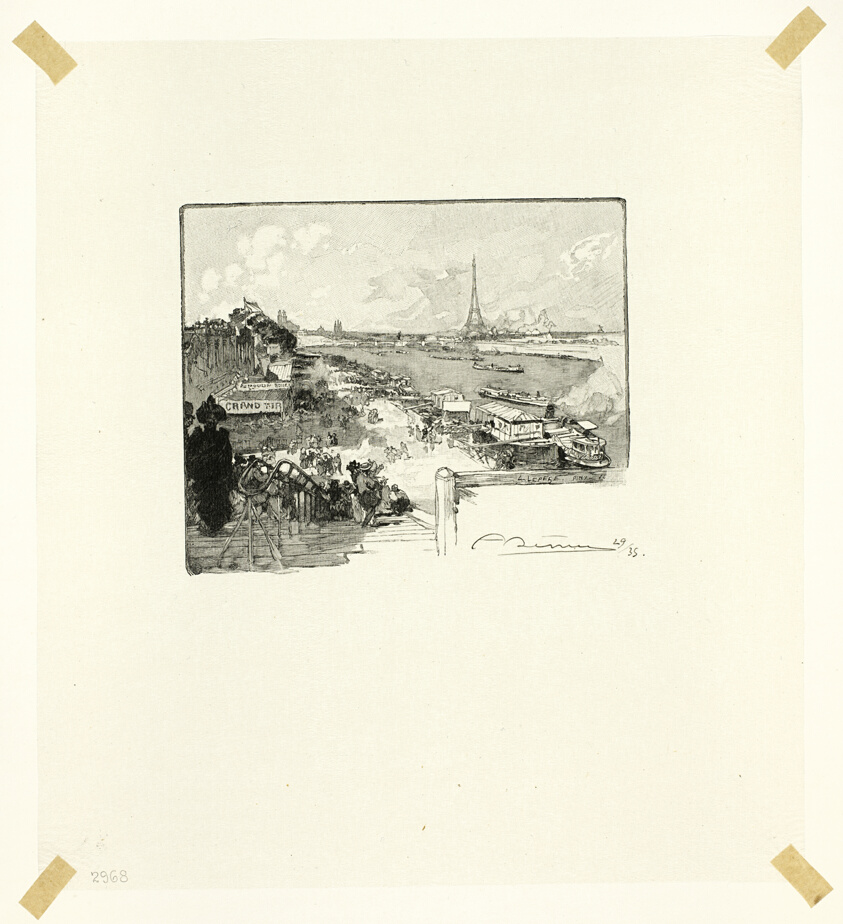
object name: Print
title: The Dawn, plate fourteen from Le Long de la Seine et des Boulevards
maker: Louis Auguste Lepère (French, 1849-1918); published by A. Desmoulins (French, active c. 1908-1910)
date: 1890, published 1910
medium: Wood engraving in black on cream Japanese tissue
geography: France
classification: wood engraving; print; prints and drawing